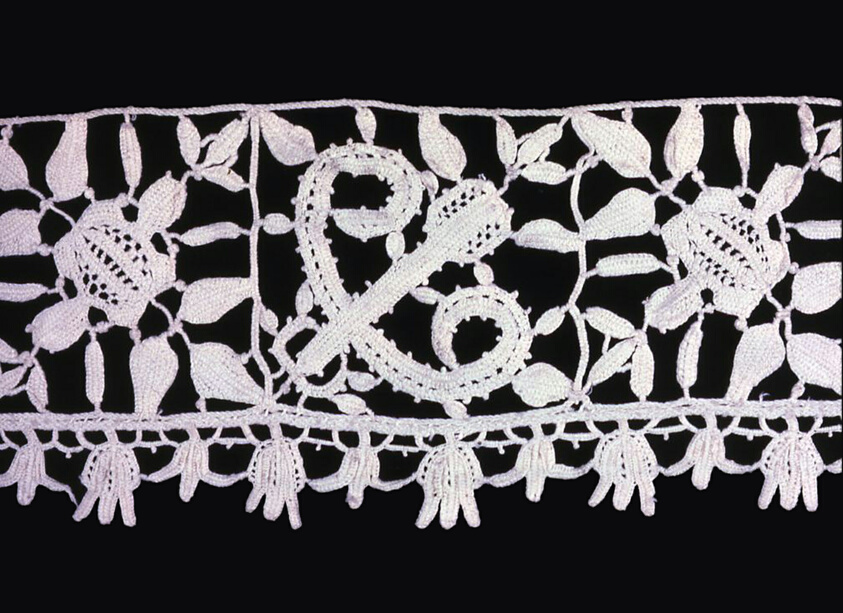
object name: Textile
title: Border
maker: Italy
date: 1575/1625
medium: Linen, needle lace worked on a laid and plaited thread grid with detached points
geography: Italy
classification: textile; lace - needle